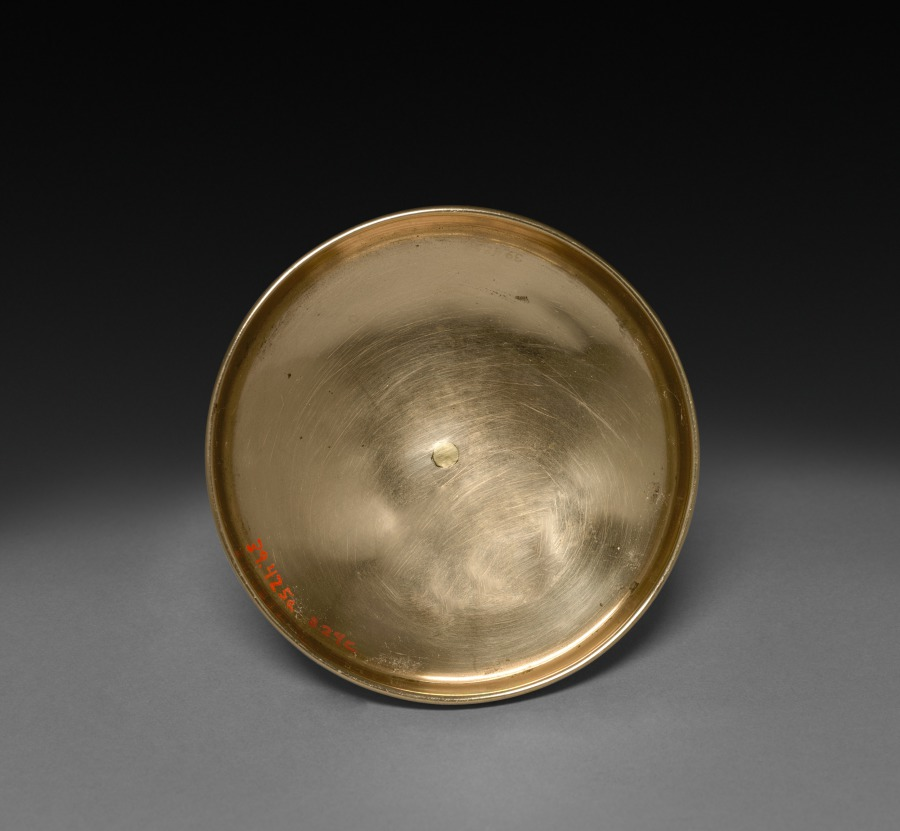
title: Container (lid)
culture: Japan, Meiji period (1868–1912) or Taishō period (1912–26)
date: early 1900s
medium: brass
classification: Metalwork